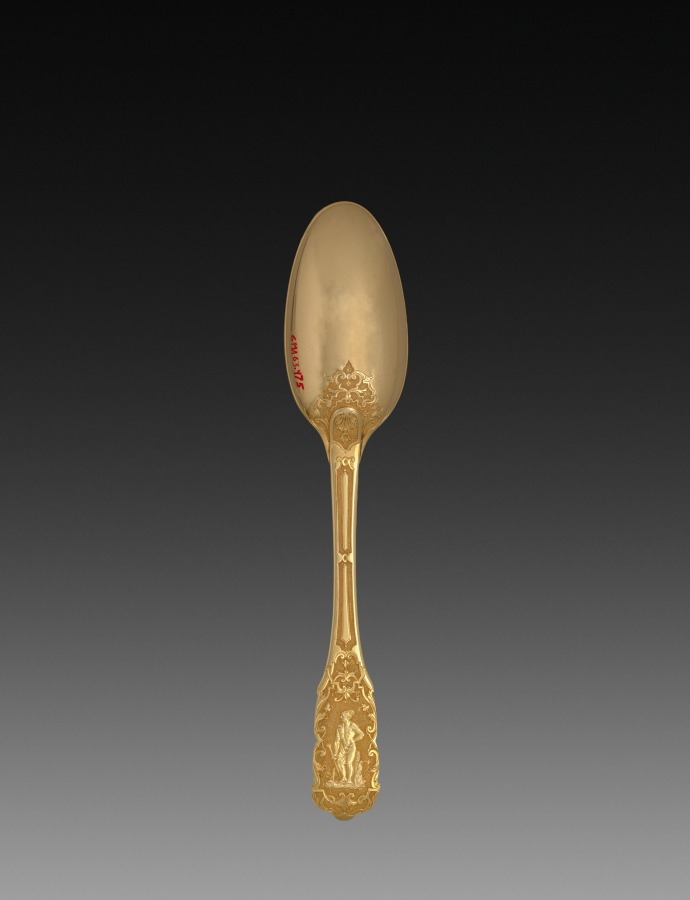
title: Spoon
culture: Germany, Augsburg(?), 18th century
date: c. 1725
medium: gold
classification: Metalwork